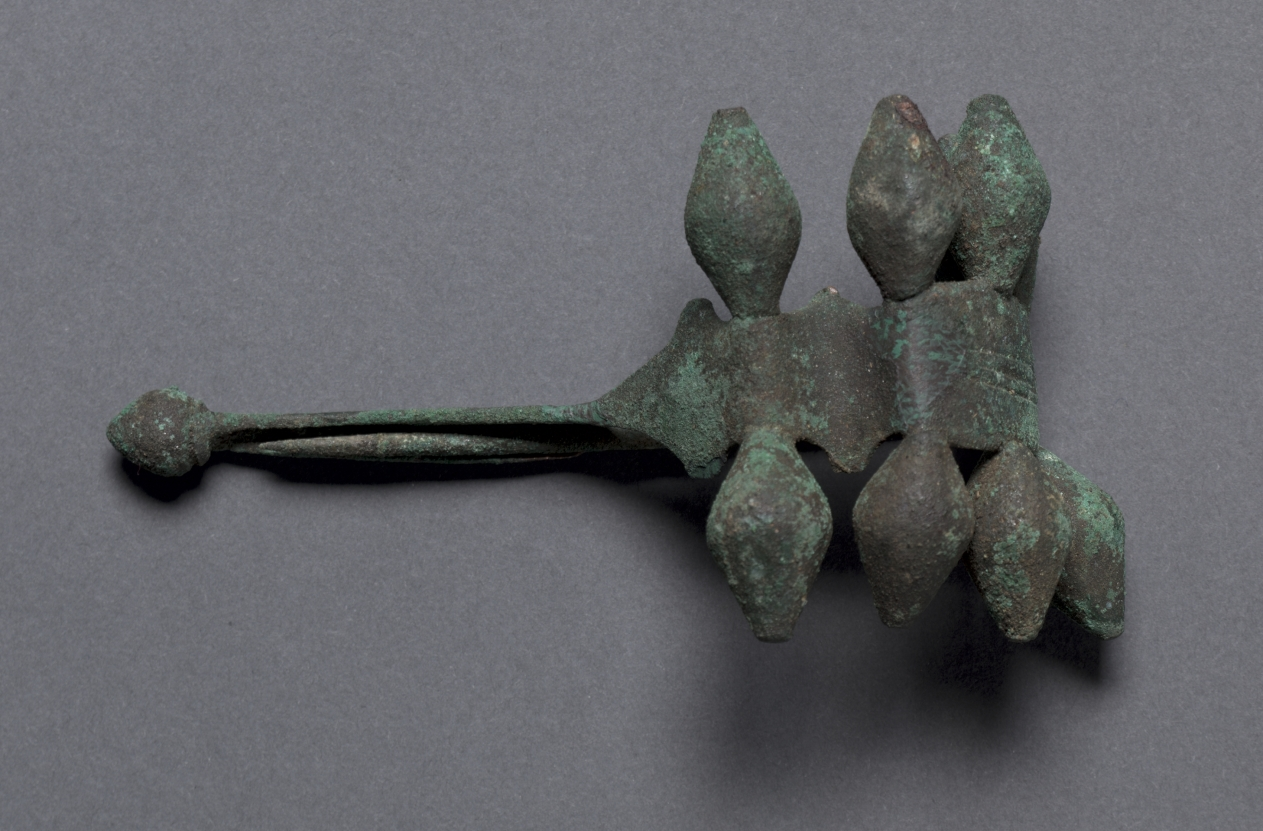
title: Fibula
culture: Etruscan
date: c. 500 BCE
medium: bronze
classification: Jewelry